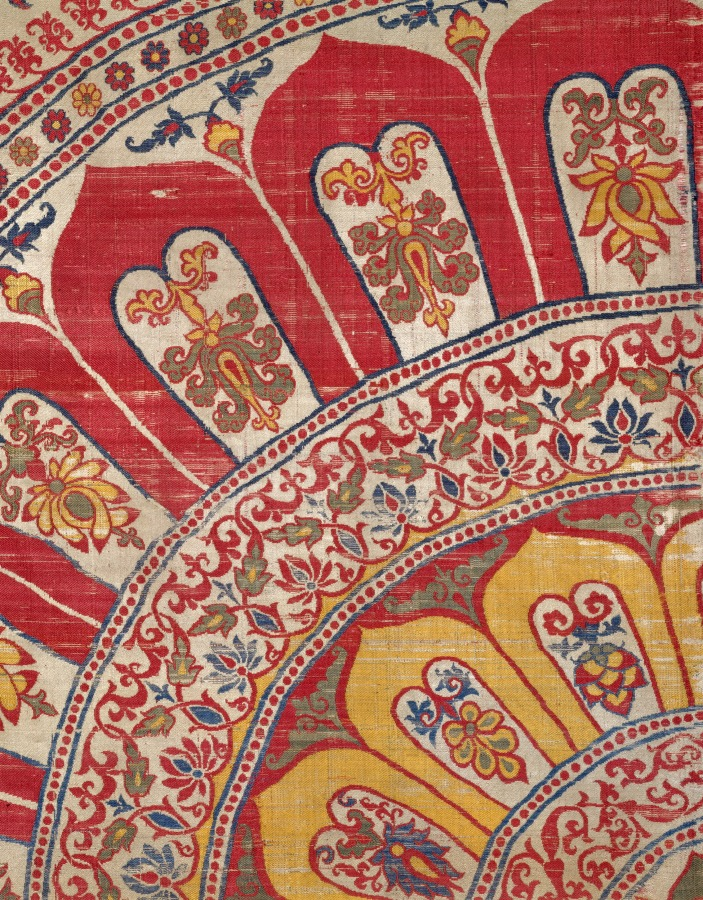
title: Lotus-blossom petal canopy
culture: Northern India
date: c. 1600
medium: silk: lampas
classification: Textile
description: The ceilings of sacred spaces throughout India were carved or painted with concentric circular lotus patterns; many also included textile canopies with the same designs. This exceptionally large example was woven in one complete section on a single loom. In India, the full-blown lotus flower bears solar connotations. It projects the radiance of a sacred or royal presence below. The motif of a dragon bearing down on a winged lion in each of the four corners indicates the designer’s recognition of a motif popular across Islamic Asia, from Turkey to Iran and Mughal India.